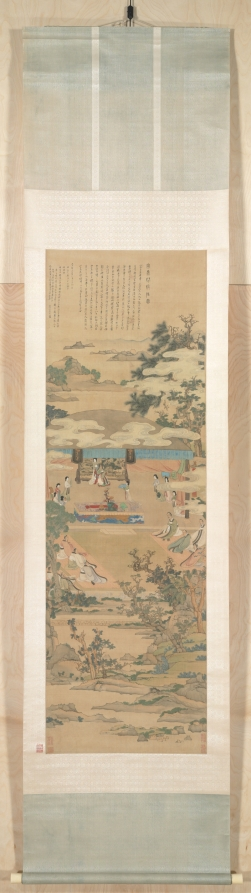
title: Lady Xuanwen Giving Instruction on the Rites of Zhou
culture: China, Ming dynasty (1368–1644)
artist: Chen Hongshou (Chinese, 1598/99–1652)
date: 1638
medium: Hanging scroll; ink and color on silk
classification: Painting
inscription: 宣文君者韋逞母宋氏也。父授以周官音義，曰：吾家世學傳周官。傳業相繼。此又周公所製，經紀〔典〕誥百官品物備於此矣。女可受之。君諷誦不輟。石帝徙山東。君乃推鹿車，背負父所授書到冀州。逞時年少。晝則採樵，夜則教逞。逞遂學成名立。仕符堅為太常。堅常幸其太學，問博士經典。乃憫禮樂遺缺。時博士盧壺對曰：廢學既久，書傳零落。比年綴撰，正經粗集。惟周官、禮經，未有其師。竊見太常韋逞母宋氏世學家，女傳其父業。得周官音義。今年八十。視聽無闕。非此母無可傳授後生。于是就宋氏家立講堂，置生員百二十人。隔絳紗縵而授業焉。拜宋氏爵，號為宣文君。賜侍婢十人。周官學後行于世。 崇禎戊寅八月二日，為綬姑六旬之辰。綬弟自成為姑偦。偕姑季女駱密、外孫楹、楠、楩、橒、楞、棅、孫女惠、漉酒上壽，屬綬圖寫，所以頌祝者。綬思宋母尚五胡之時，經藉屬之婦人；今太平有象，而秉杖名義者，獨綬姑爾。敬寫此圖，且厚望于弟紹焉。猶子洪綬九頓首。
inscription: 5 additional seals: 2 of Xu Weiren 徐渭仁(1788－1855); 2 of Sun Zutong 孫祖同 (1894–1937); 1 of C. C. Wang 王季遷 (1907–2003).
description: This painting by Chen Hongshou depicts the story of Xuanwen Jun, or Lady of Literary Propagation, at a venerable age, instructing young scholars on the Confucian classics. It was painted for Chen’s aunt in celebration of her 60th birthday. Chen’s painting style is archaic in the use of fine outlines and brilliant coloring with mineral pigments. In depicting the figures, he uses the “iron-wire” brush style (fine, even lines) with deliberate control. The faces are elongated and exaggerated. A few ritual bronzes lend the scene an antique flavor.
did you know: Chen Hongshou's long inscription at the top of the painting compares his virtuous aunt with the historical exemplar, Lady Xuanwen.